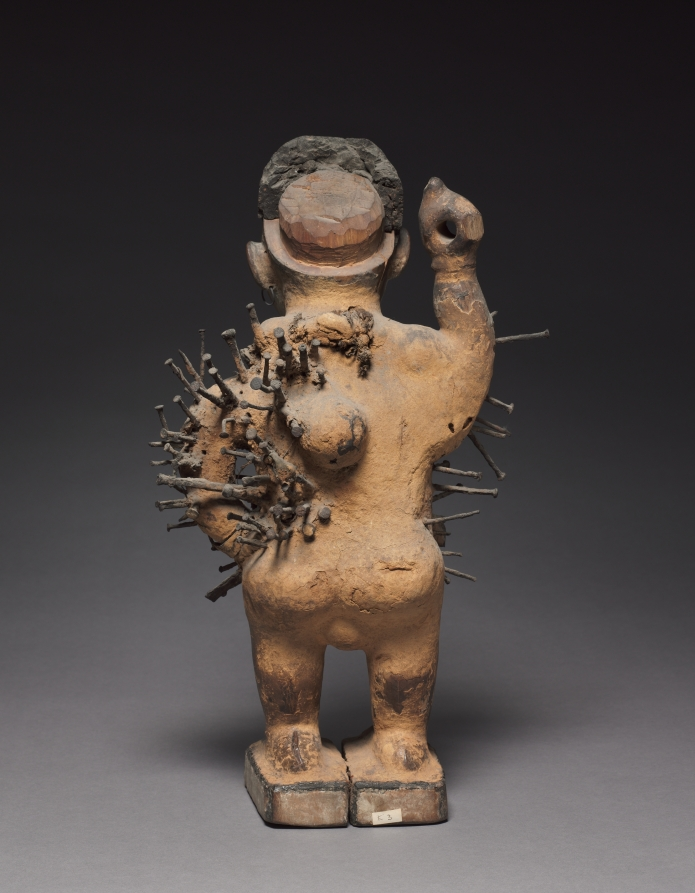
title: Male figure (nkisi nkondi)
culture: Democratic Republic of Congo or Cabinda (Angola), Kongo artist and nganga (priest)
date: late 1800s-early 1900s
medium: Wood, metalized glass, iron, organic material, ivory or plastic, and natural fiber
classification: Sculpture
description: This nkisi nkondi (power figure) lacks most of the materials that transformed it into a vessel for a spirit. Carved by sculptors, minkisi hosted spirits after banganga (priests) placed substances inside to empower them. The mirrored eyes, resin cap, and stomach chamber once contained empowering materials. After the nkisi had served its purpose the nganga removed the materials, stripping it of its spiritual power; the remaining sculpture was discarded. Sometimes, Kongo people removed materials as acts of anti-colonial resistance, disempowering minkisi before Europeans seized them. While we don’t know why it was disempowered, this sculpture is no longer spiritually active.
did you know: A mix of locally made and imported metal nails, blades, and screws cover this figure.